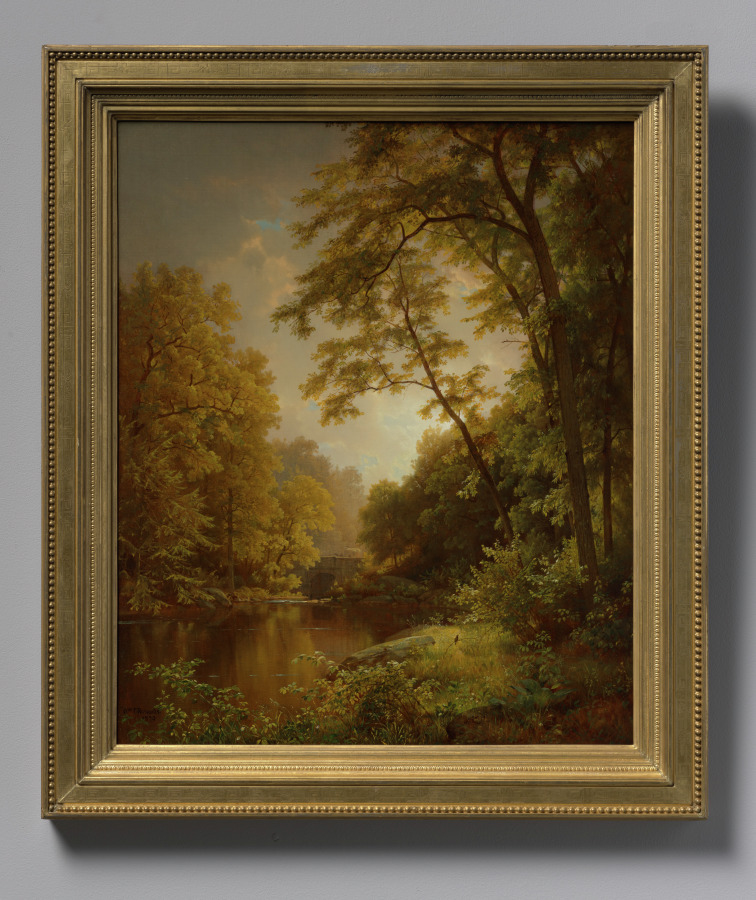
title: June Day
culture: America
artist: William Trost Richards (American, 1833–1905)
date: 1870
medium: oil on canvas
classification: Painting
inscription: signed lower left: Wm T. Richards. / 1870